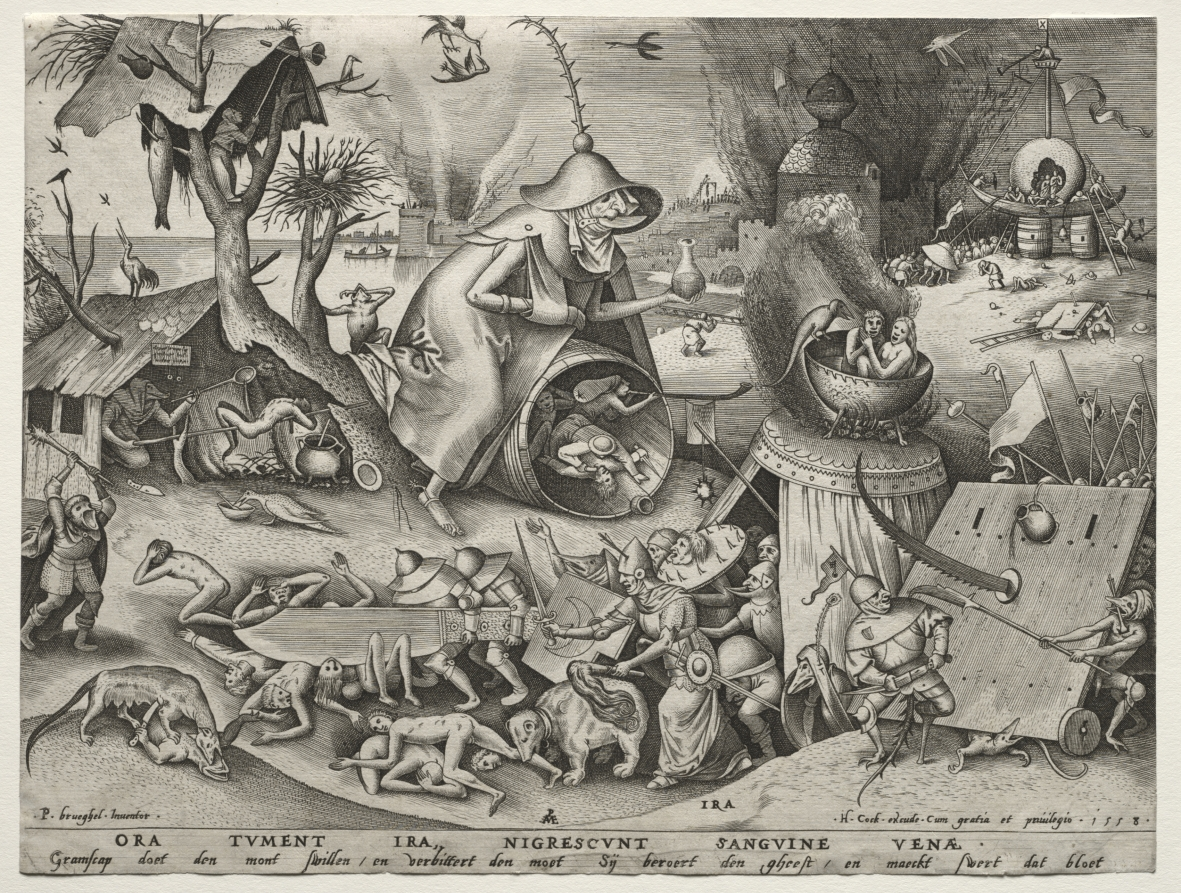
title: The Seven Deadly Sins: Anger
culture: Flanders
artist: Pieter Bruegel (Netherlandish, c. 1525/30–1569)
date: 1558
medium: etching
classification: Print